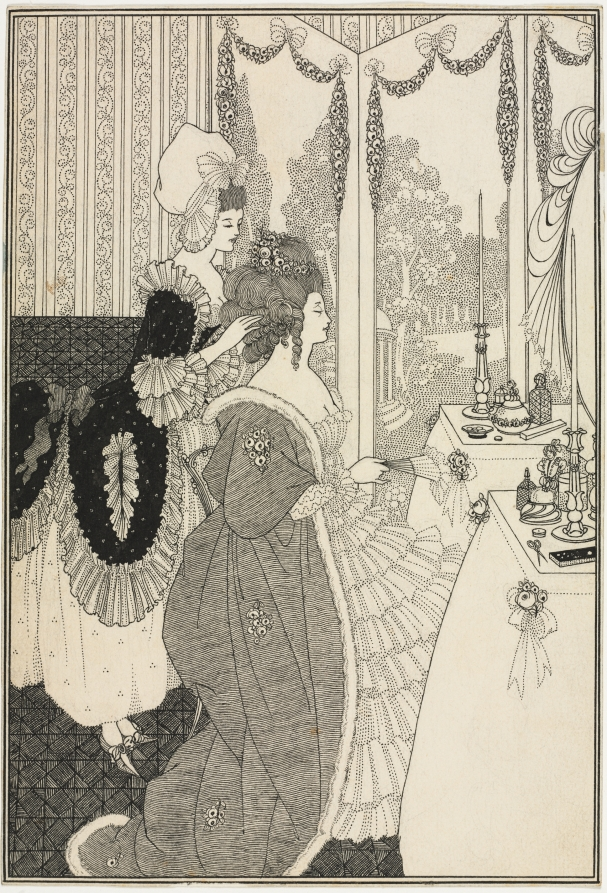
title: The Toilet, from The Rape of the Lock by Alexander Pope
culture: England, 19th century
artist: Aubrey Beardsley (British, 1872–1898)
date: c. 1895–96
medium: pen and black ink with traces of graphite underdrawing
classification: Drawing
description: In this drawing, Aubrey Beardsley illustrates an early scene in Alexander Pope’s satirical masterpiece The Rape of the Lock (1712) in which the heroine, Belinda, primps in her boudoir. Reflecting the poem’s emphasis on contrived rather than natural beauty, the drawing is densely layered with artifice. A view of an idyllic garden with a cupola-topped pavilion is glimpsed not through a window as it would first seem, but on a folding screen. The bejeweled bottles littering the table serve as emblems of Belinda’s vanity.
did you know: After a rapid rise to fame and notoriety, Aubrey Beardsley produced hundreds of drawings before falling victim to tuberculosis at the age of 25.